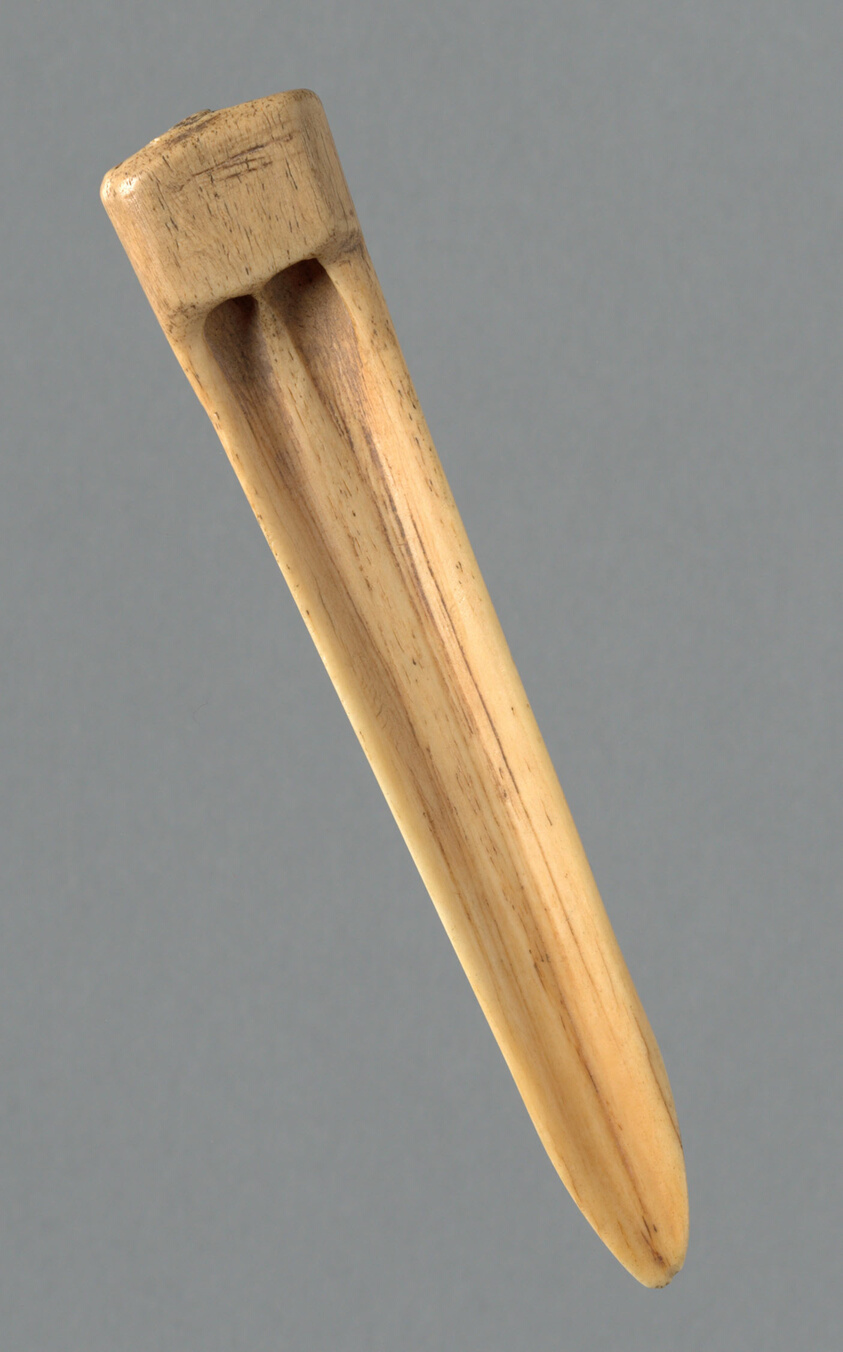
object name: non-art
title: Bone Pick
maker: Peru, Probably central coast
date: 1000/1476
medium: Bone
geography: Peru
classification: textile; textile working equipment; weaving